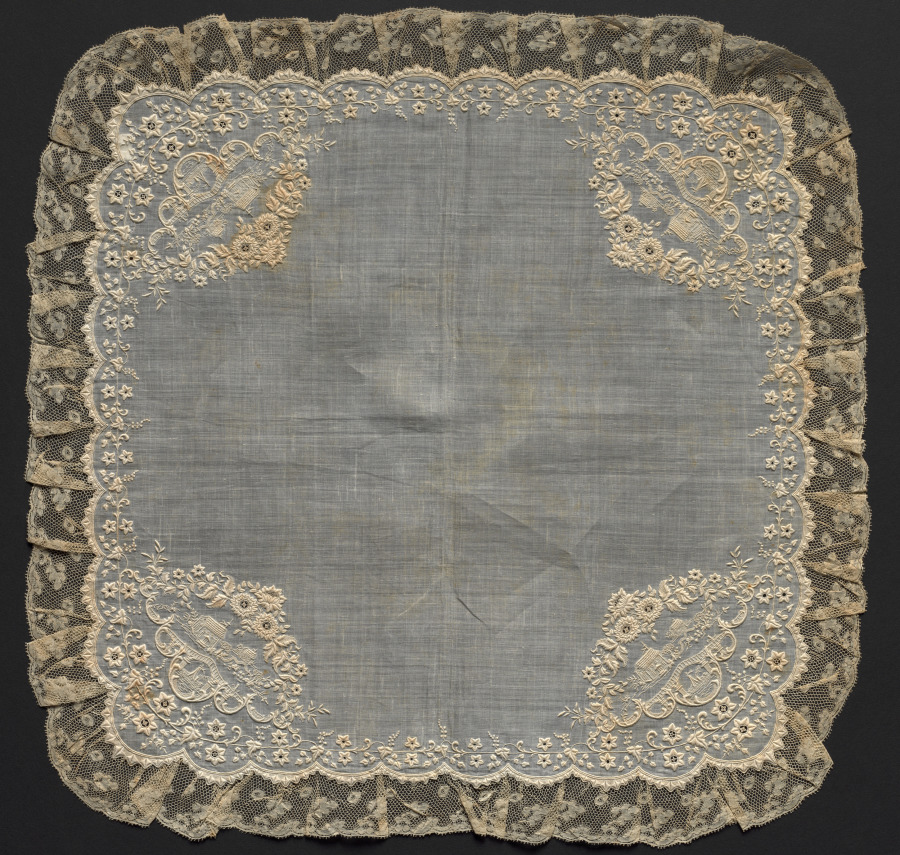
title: Lace Handkerchief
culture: France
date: 1700s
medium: Plain weave linen ground: bobbin lace (Valenciennes lace) edging and embroidery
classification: Embroidery